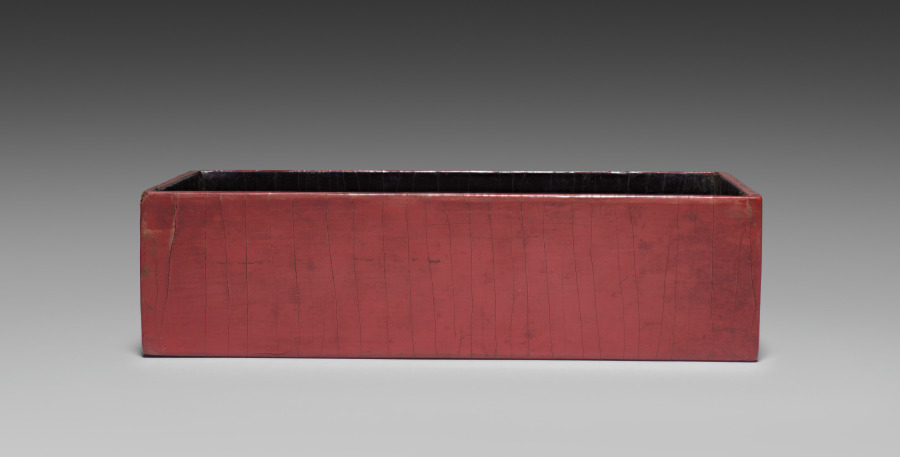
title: Drawer for a Tihong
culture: China, Ming dynasty (1368-1644), Wanli reign (1572-1620)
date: 1585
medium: carved cinnabar lacquer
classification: Lacquer